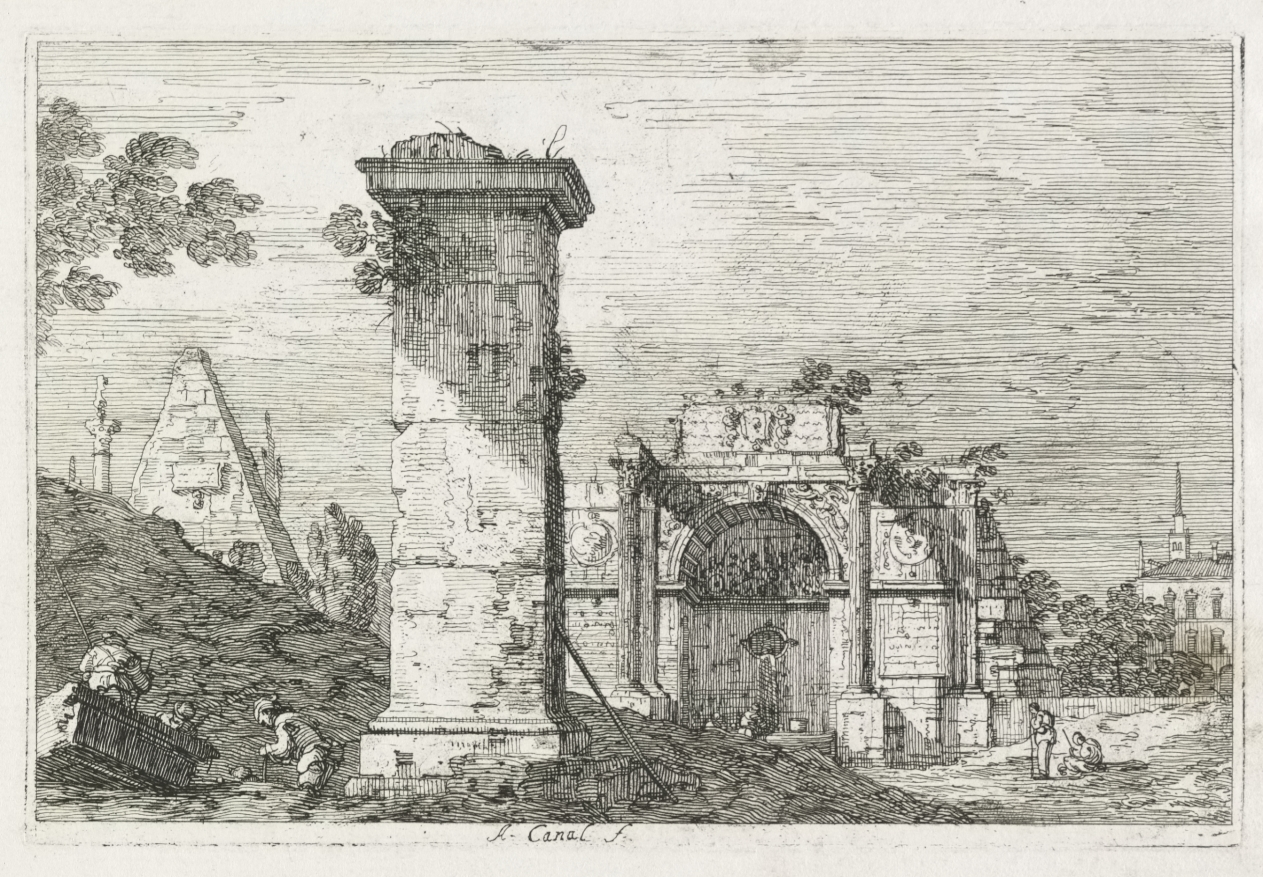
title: Views: Le Pilier isolè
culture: Italy, Venice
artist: Antonio Canaletto (Italian, 1697–1768)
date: 1735–1746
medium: etching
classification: Print